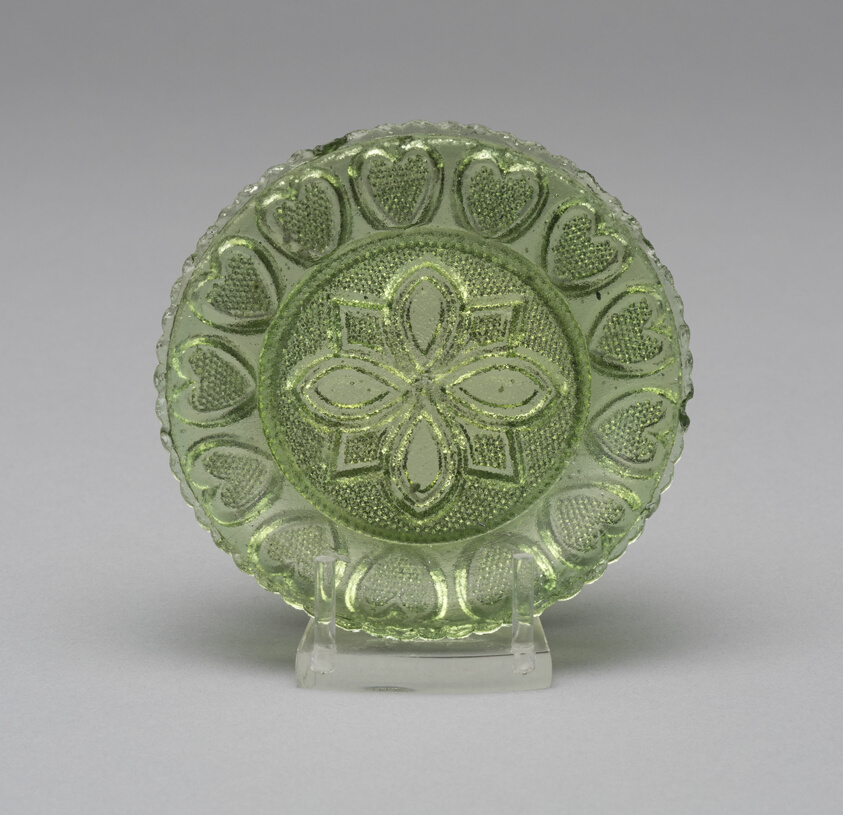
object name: Glass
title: Cup plate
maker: Artist unknown (American, 19th century); Midwest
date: 1830–40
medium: Pressed glass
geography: Midwest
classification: plate (general, dish); glass; american decorative arts; american arts; decorative arts